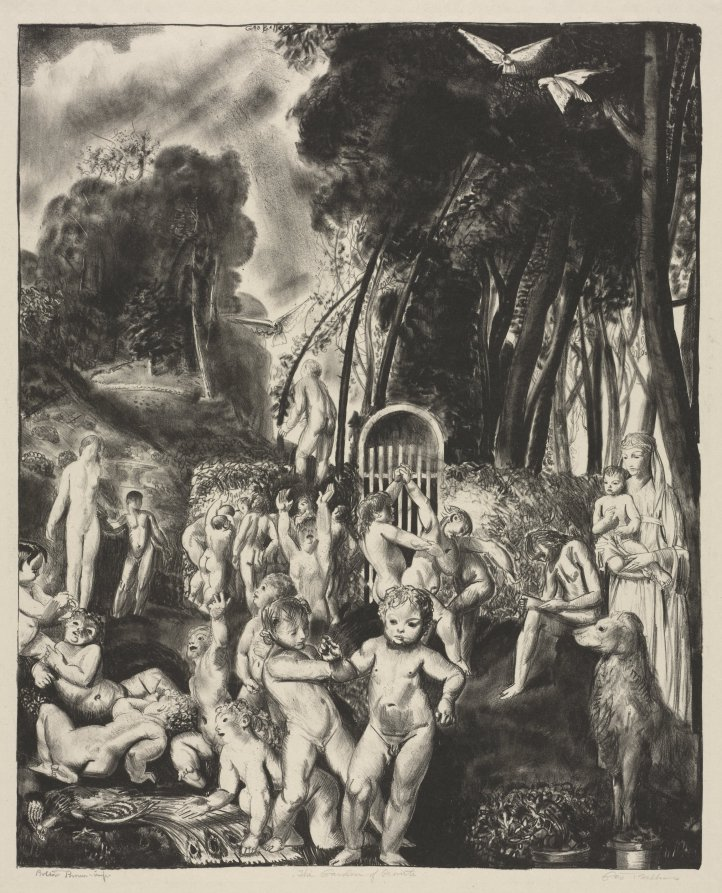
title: The Garden of Growth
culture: America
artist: George Bellows (American, 1882–1925)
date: 1923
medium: lithograph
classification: Print